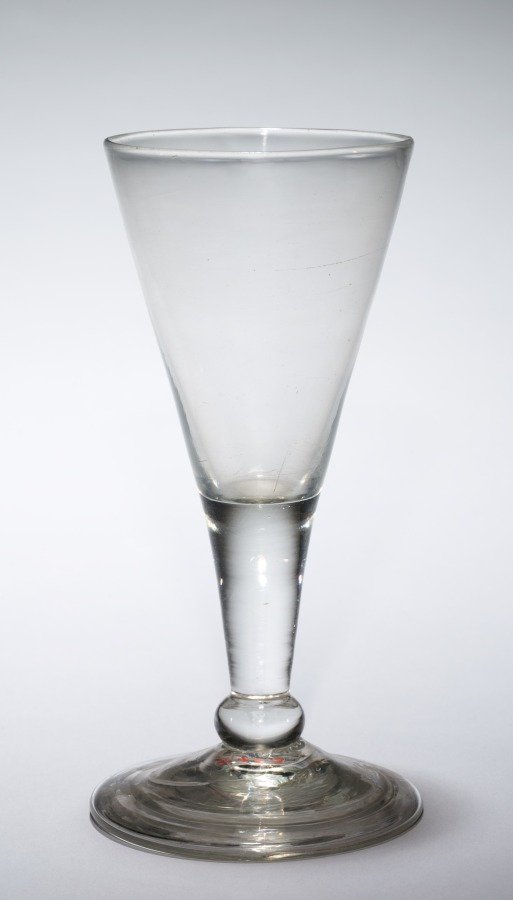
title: Tavern Glass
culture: England, 18th century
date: 1700–1750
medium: glass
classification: Glass